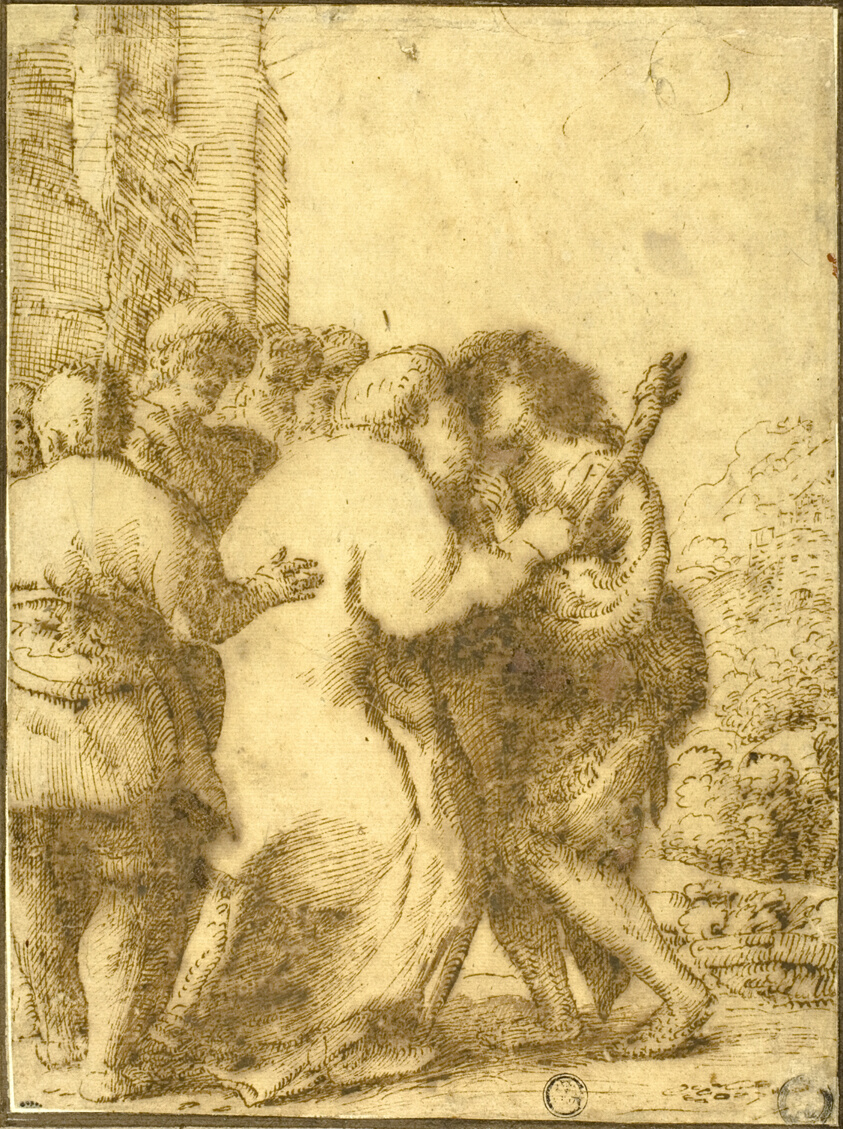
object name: Drawing and Watercolor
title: Return of the Prodigal Son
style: medieval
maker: Unknown Artist (North Italian, 1500-1599); possibly Giuseppe Caletti (Italian, c. 1600 - c. 1660)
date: 1600s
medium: Pen and iron gall ink on tan laid paper, laid down on brown laid card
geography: Northern Italy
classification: drawings (visual works); manuscript; prints and drawing